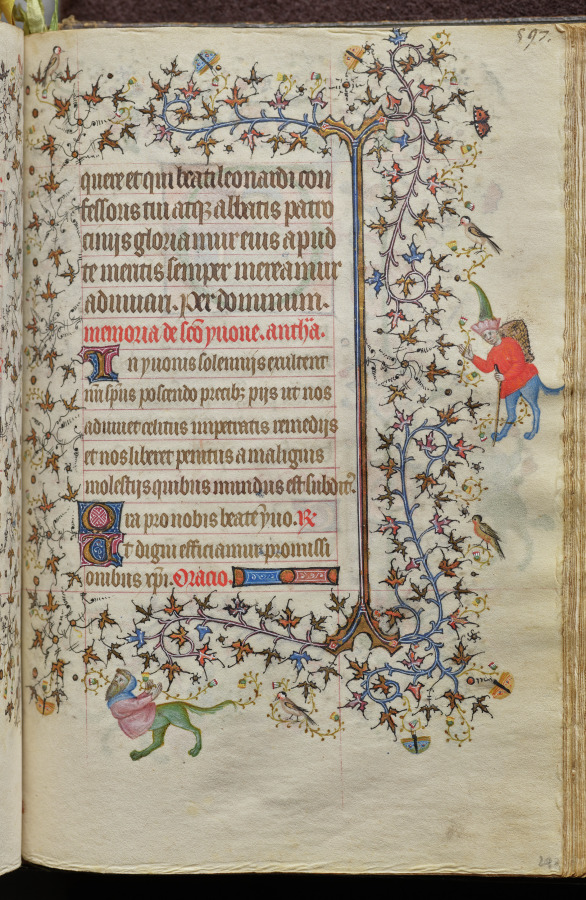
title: Hours of Charles the Noble, King of Navarre (1361-1425): fol. 293r, Text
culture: France, Paris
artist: Master of the Brussels Initials and Associates (French)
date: c. 1405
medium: ink, tempera, and gold on vellum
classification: Bound Volume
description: This precious volume was obviously highly prized by its owner, the French-born King of Navarre, who had his coat of arms painted on no less than twenty folios. Rather than directly commissioning this manuscript from a specific workshop, it seems that Charles the Noble acquired his book of hours -- perhaps ready-made for the luxury market -- while on a trip to Paris in 1404-05. A collaborative effort, six painting styles are evidenced within the pages of this codex, those of two Italians, two Frenchmen, and two Netherlanders. The painter who was responsible for the planning and decoration of the book, and who produced seventeen of the large miniatures, was a Bolognese artist known as the Master of the Brussels Initials. His principal assistant, responsible for most of the borders, was a Florentine who signed his name "Zecho" da Firenze on folio 208 verso.